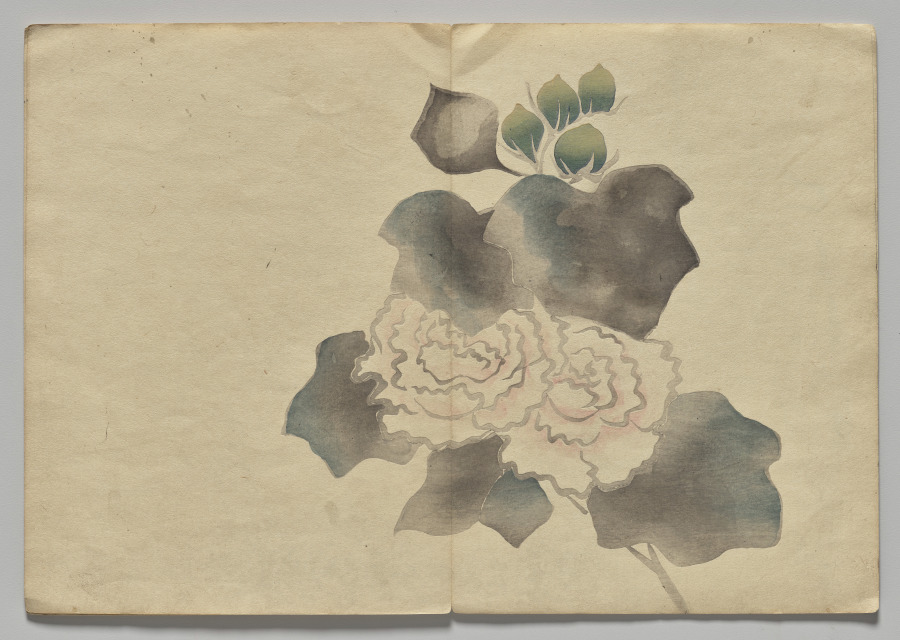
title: Scene from The Kōrin Picture Book (Volume 2)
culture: Japan, Edo period (1615–1868)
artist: Nakamura Hōchū (Japanese, d. 1819)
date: 1800s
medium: color woodblock printed book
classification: Bound Volume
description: Ogata Korin (1658-1716) was one of the most admired artists of Rimpa, or "decorative school painting." These books by the charming later-generation Rimpa artist Hochu record Korin's inventive designs.